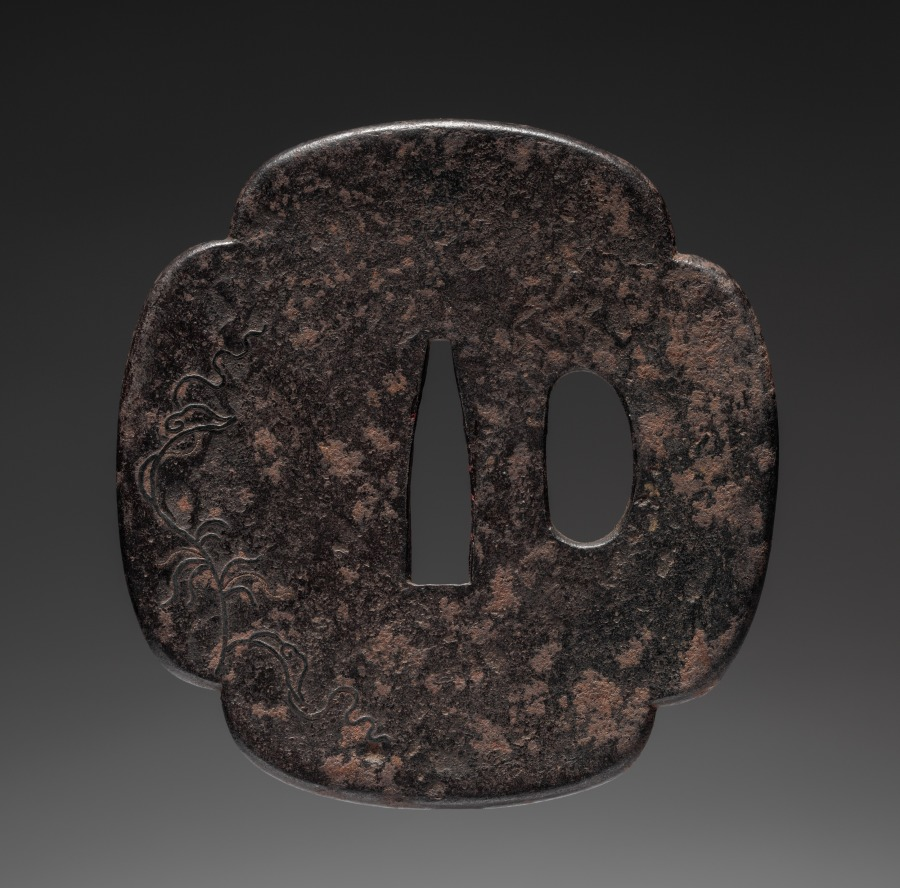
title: Sword Guard (Tsuba)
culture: Japan, possibly Edo period (1615-1868)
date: c. 1615–1868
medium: iron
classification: Arms and Armor